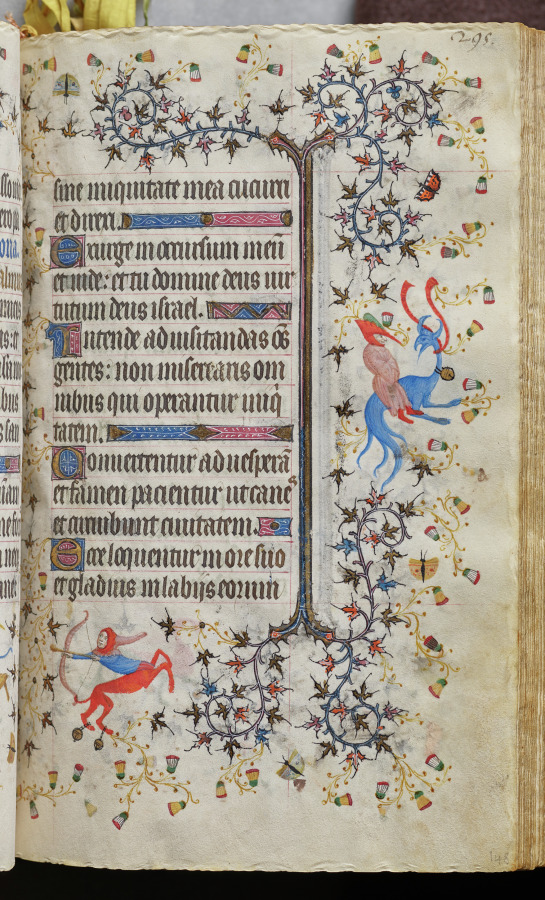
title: Hours of Charles the Noble, King of Navarre (1361-1425): fol. 148r, Text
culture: France, Paris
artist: Master of the Brussels Initials and Associates (French)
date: c. 1405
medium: ink, tempera, and gold on vellum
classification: Bound Volume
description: This precious volume was obviously highly prized by its owner, the French-born King of Navarre, who had his coat of arms painted on no less than twenty folios. Rather than directly commissioning this manuscript from a specific workshop, it seems that Charles the Noble acquired his book of hours -- perhaps ready-made for the luxury market -- while on a trip to Paris in 1404-05. A collaborative effort, six painting styles are evidenced within the pages of this codex, those of two Italians, two Frenchmen, and two Netherlanders. The painter who was responsible for the planning and decoration of the book, and who produced seventeen of the large miniatures, was a Bolognese artist known as the Master of the Brussels Initials. His principal assistant, responsible for most of the borders, was a Florentine who signed his name "Zecho" da Firenze on folio 208 verso.